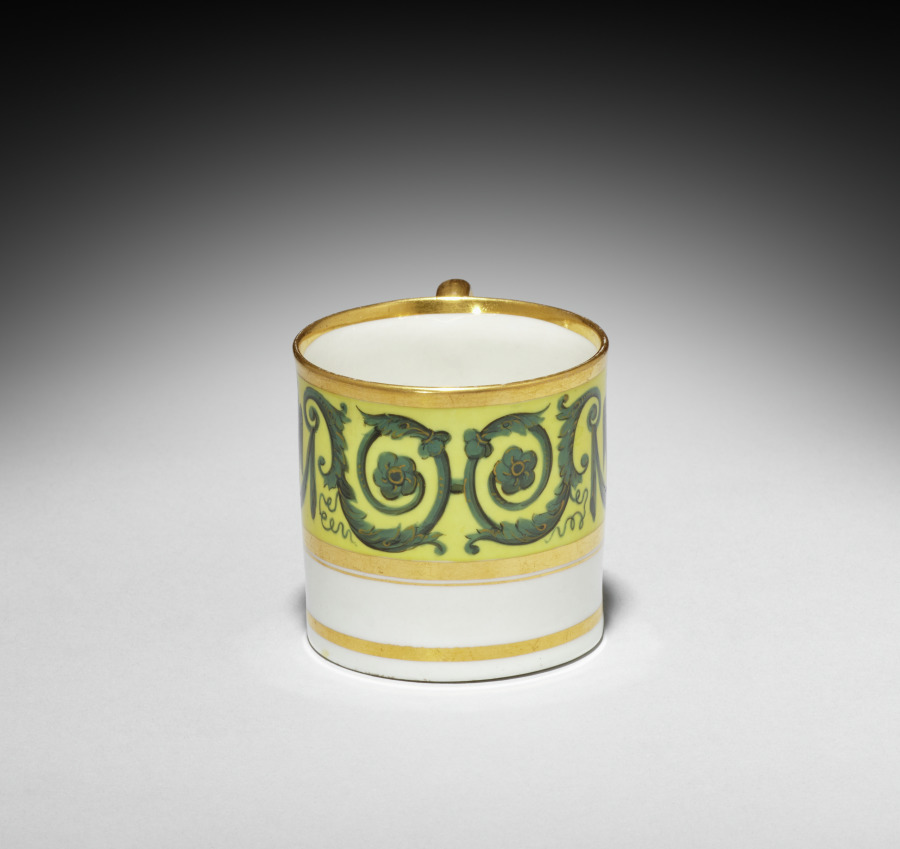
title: Cup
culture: England, 19th century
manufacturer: Worcester Porcelain Factory (British, established 1751)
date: 1807–1813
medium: porcelain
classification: Ceramic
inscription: in overglaze red: "Barr, Flight and Barr/ Royal Porcelain Works/ Worcester/ London -- House/ Flight & Barr/ Coventry Street," surrounded by: "Manufacturers to their Majesties Prince of Wales and Royal Family. Established 1751."